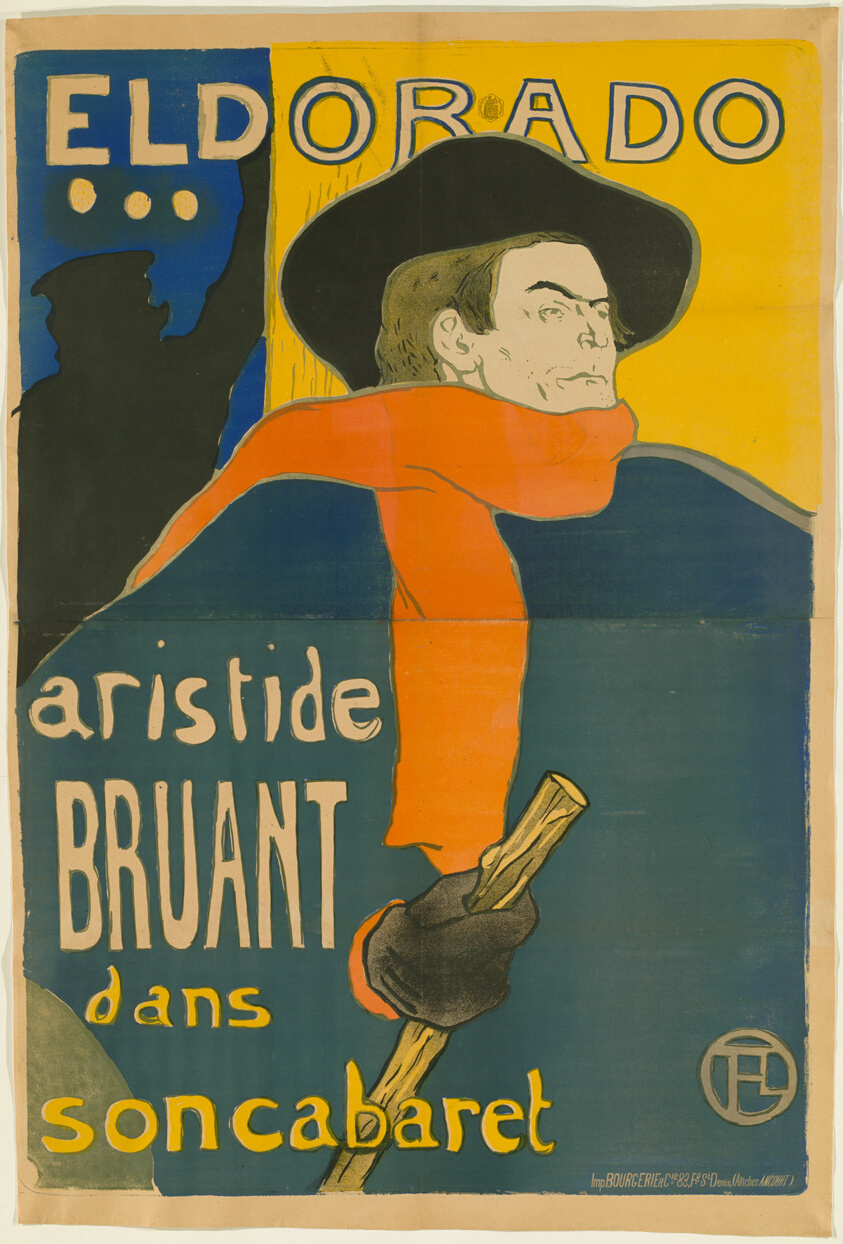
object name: Print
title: Eldorado: Aristide Bruant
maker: Henri de Toulouse-Lautrec (French, 1864-1901)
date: 1892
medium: Color lithograph on tan wove paper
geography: France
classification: lithograph; print; prints and drawing; poster